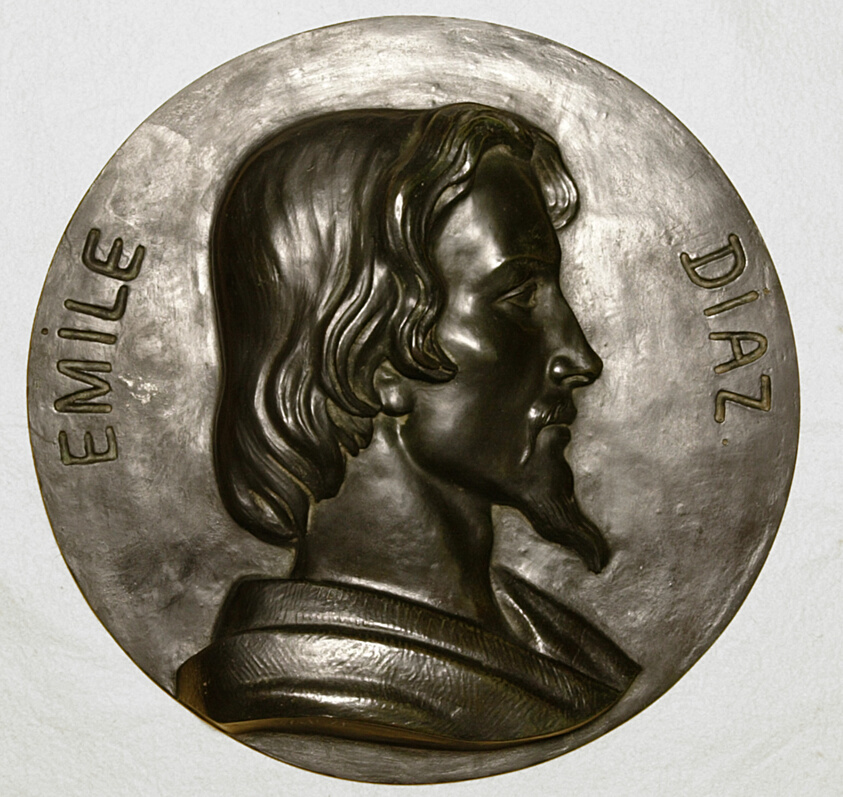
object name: Sculpture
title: Emile Diaz, Son of the Painter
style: nineteenth century, 19th century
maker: Antoine Louis Barye (French, 1795–1875)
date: 1850/75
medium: Bronze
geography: France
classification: relief; portrait; medal; french; sculpture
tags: portraits: male subject, sons, profile, portraits, portrait, head, families